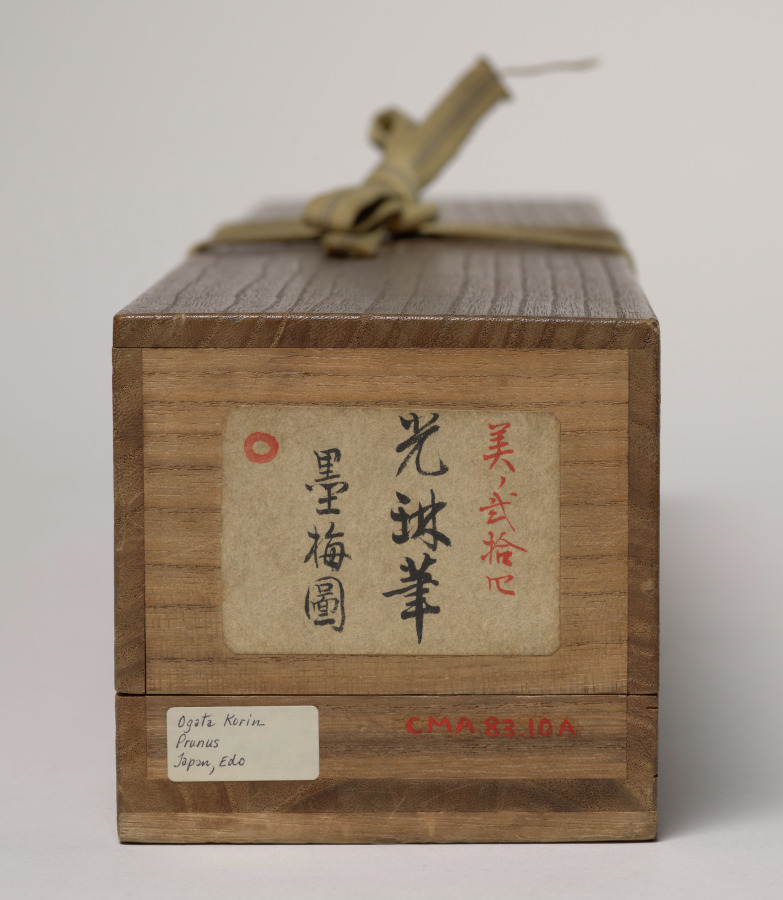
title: Plum Tree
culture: Japan, Edo period (1615–1868)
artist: Ogata Kōrin (Japanese, 1658–1716)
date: c. 1700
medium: hanging scroll; ink on silk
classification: Painting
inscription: Artist's signature and seal above hillock bottom right corner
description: Ogata Kōrin had to think through his design carefully to create these white plum blossoms and deliver their effect, as he used the reserve technique—where selected areas of the painting surface are left unpainted—to achieve it. He probably roughed in the tree before applying an ink wash to the entire silk surface, except where he intended to place the flowers. He likely then returned to articulate the petals and, in some cases, the pistils and stamens. The composition shows the tree twisting out of view, only to return with a branch of new growth jabbing forth from an old, broken limb, thereby heightening the visual impact of the blossoms.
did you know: The Rinpa style of painting is named for Ogata Kōrin, even though he did not create it.